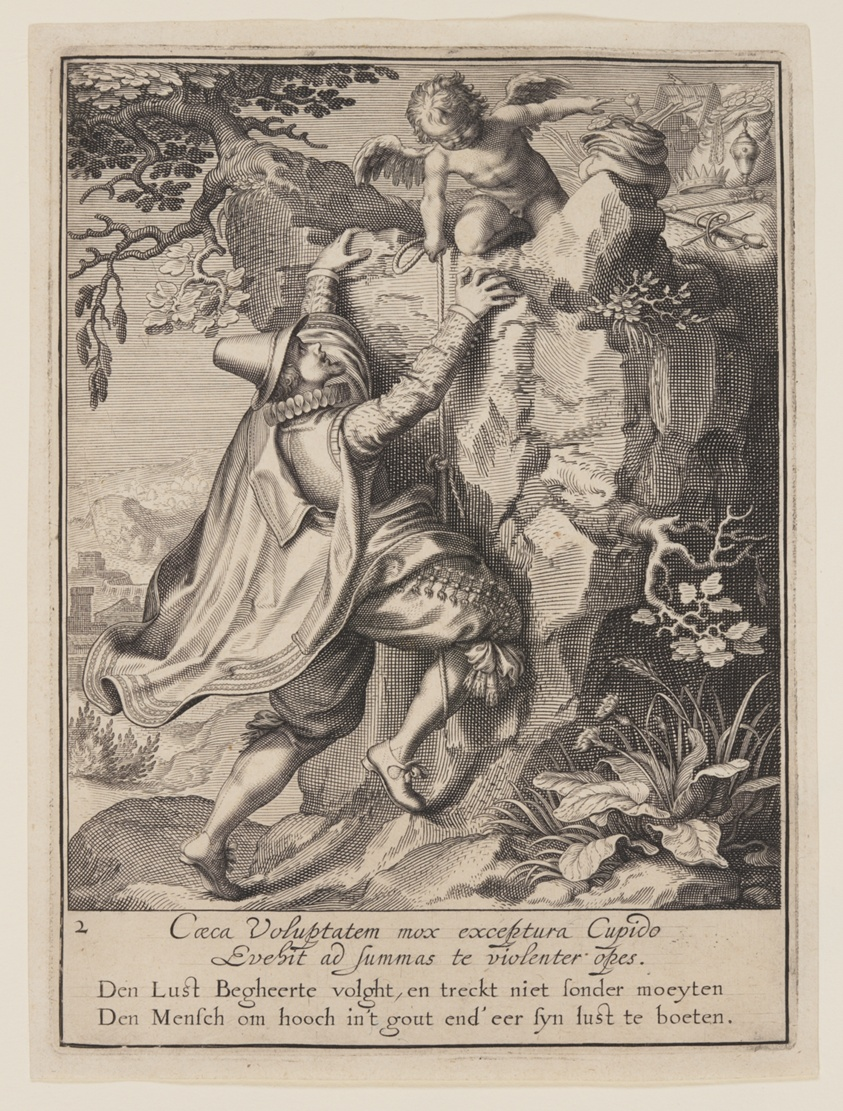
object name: Print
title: A Young Man Climbing a Hillside Aided by Cupid, from Allegory of the Misuse of Worldly Property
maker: Willem van Swanenburgh (Dutch, 1580–1612); after Maerten van Heemskerck (Dutch, 1498–1574)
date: 1609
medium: Engraving on ivory laid paper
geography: Netherlands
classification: engraving; paper; print; prints and drawing